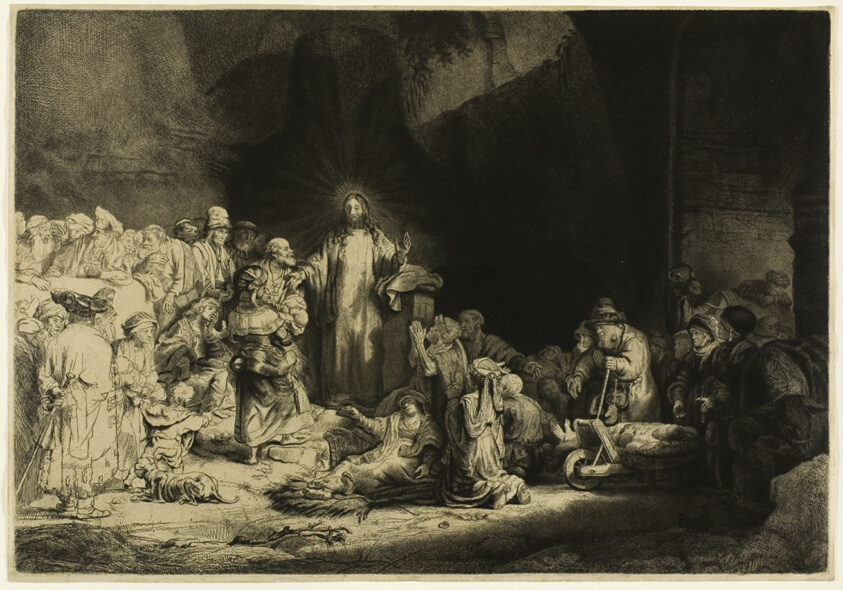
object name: Print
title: The Hundred Guilder Print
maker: Rembrandt van Rijn (Dutch, 1606-1669)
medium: Etching on paper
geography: Holland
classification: etching; print; prints and drawing; paper